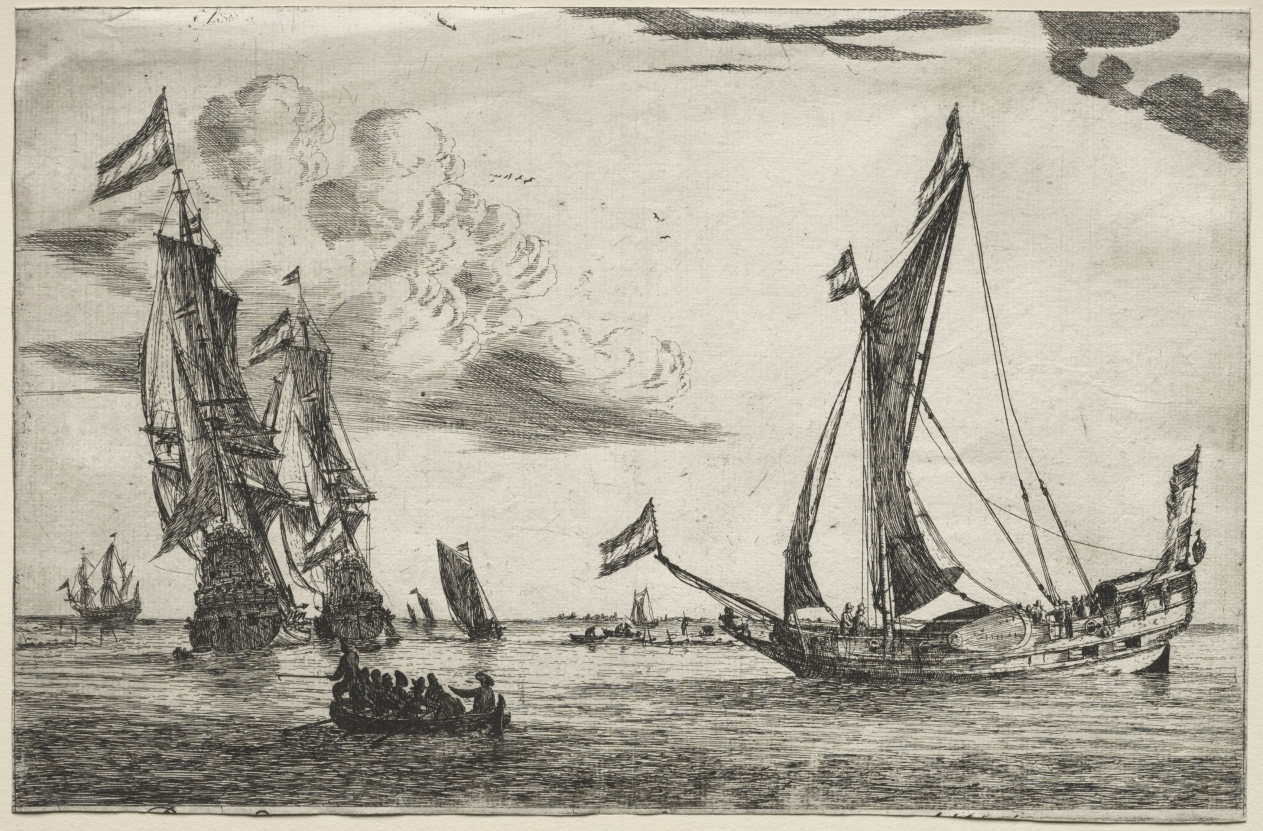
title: Marine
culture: Netherlands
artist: Abraham Zeeman (Dutch, c.1695/6–1754)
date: c. 1732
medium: etching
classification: Print